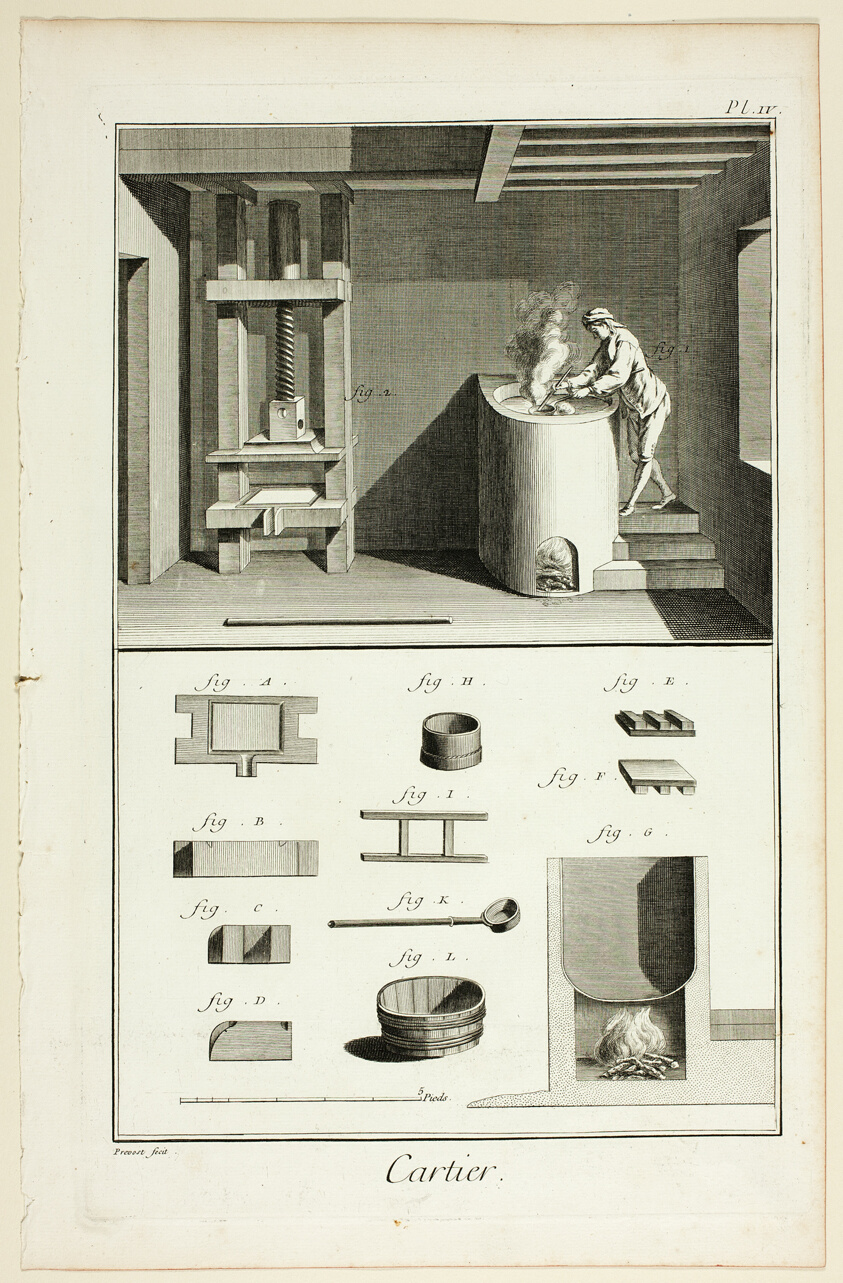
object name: Print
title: Card-Maker, from Encyclopédie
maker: Benoît-Louis Prévost (French, c. 1735-1809); published by André le Breton (French, 1708-1779), Michel-Antoine David (French, c. 1707-1769), Laurent Durand (French, 1712-1763), and Antoine-Claude Briasson (French, 1700-1775)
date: 1762/77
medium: Engraving on cream laid paper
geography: France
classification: etching; print; prints and drawing